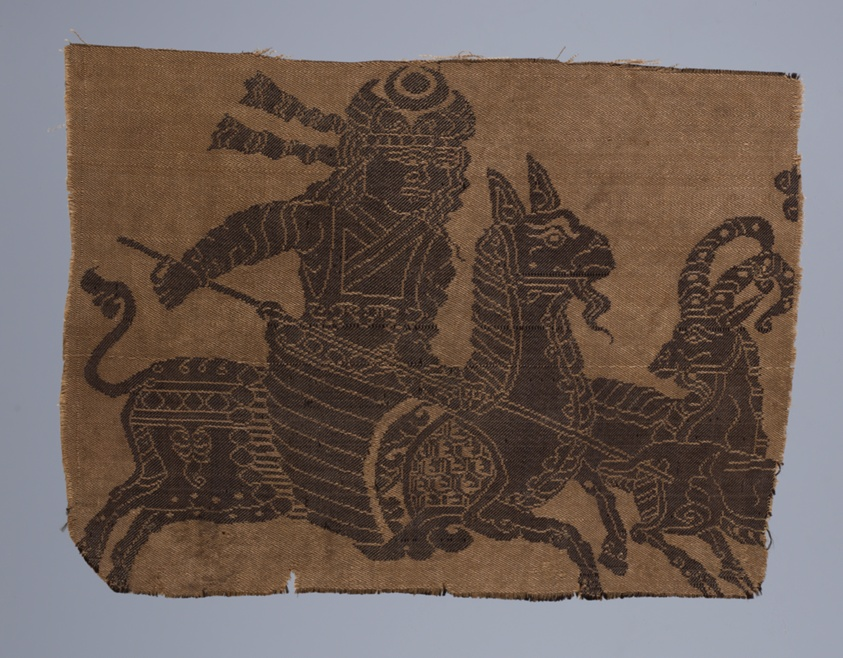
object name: Textile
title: Fragment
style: saveh, seljuk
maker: Iran (Persia, Saveh)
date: 10th/11th century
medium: Silk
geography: Iran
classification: textile; weaving